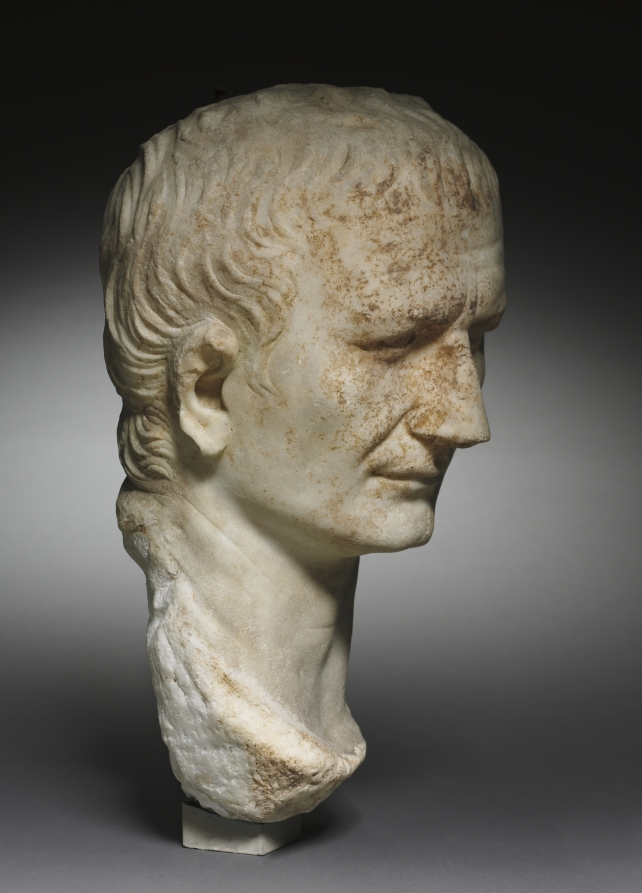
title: Portrait Head of Emperor Vespasian, Recut from Head of Nero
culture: Italy, Roman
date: 64–79 CE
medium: marble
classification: Sculpture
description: Although this portrait head was designed to fit into a statue of a body, it did not originally belong with the togate body that held it when purchased by the museum in 1929. In 1973, the two were separated, and the body is now in storage. The head itself was recarved in antiquity, from a likeness of Nero to one of Vespasian, following the damnatio memoriae (condemnation of memory) of the former. A line at the back of head shows clearly where the long hair of Nero has been shortened, while other Neronian features, such as a receding lower lip, remain.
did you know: Originally a portrait of Emperor Nero, this head was recarved after his damnatio memoriae (condemnation of memory).